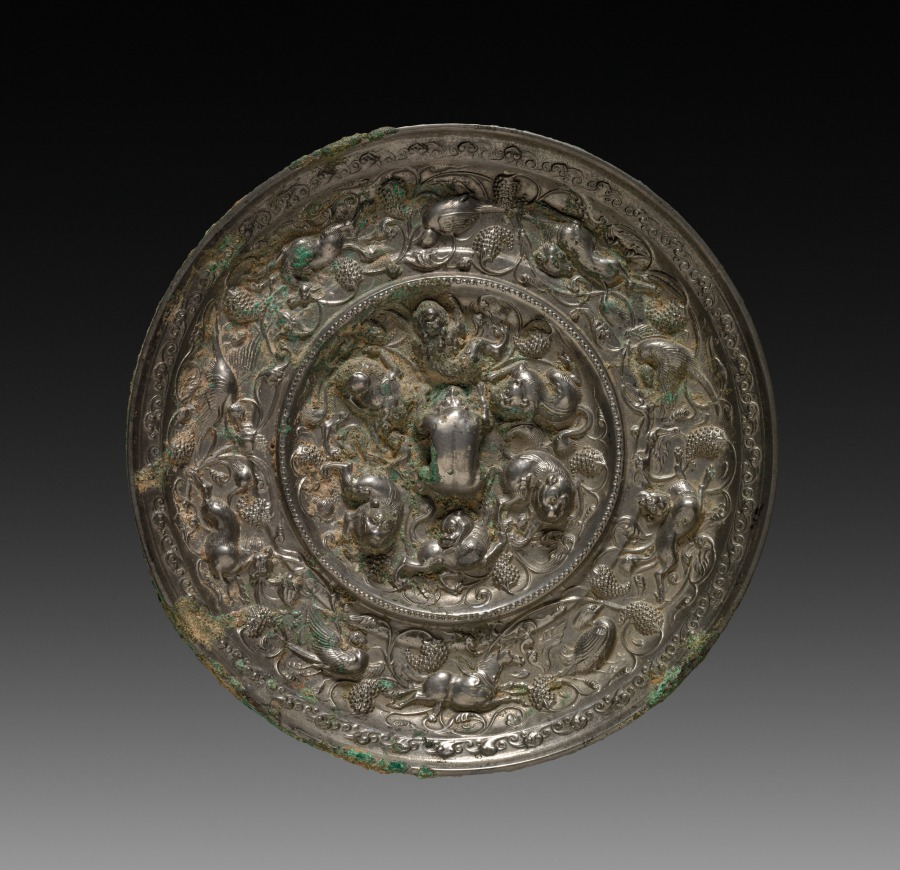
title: Mirror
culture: China, Tang dynasty (618–907)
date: 618–907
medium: bronze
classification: Metalwork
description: The predominant motifs on this mirror, the lion and the grapevine, were both foreign to China. The popularity of this mirror type, which lasted until the fall of the Tang dynasty, demonstrates the cosmopolitan tastes of wealthy Chinese during this extremely prosperous and artistically vigorous period.